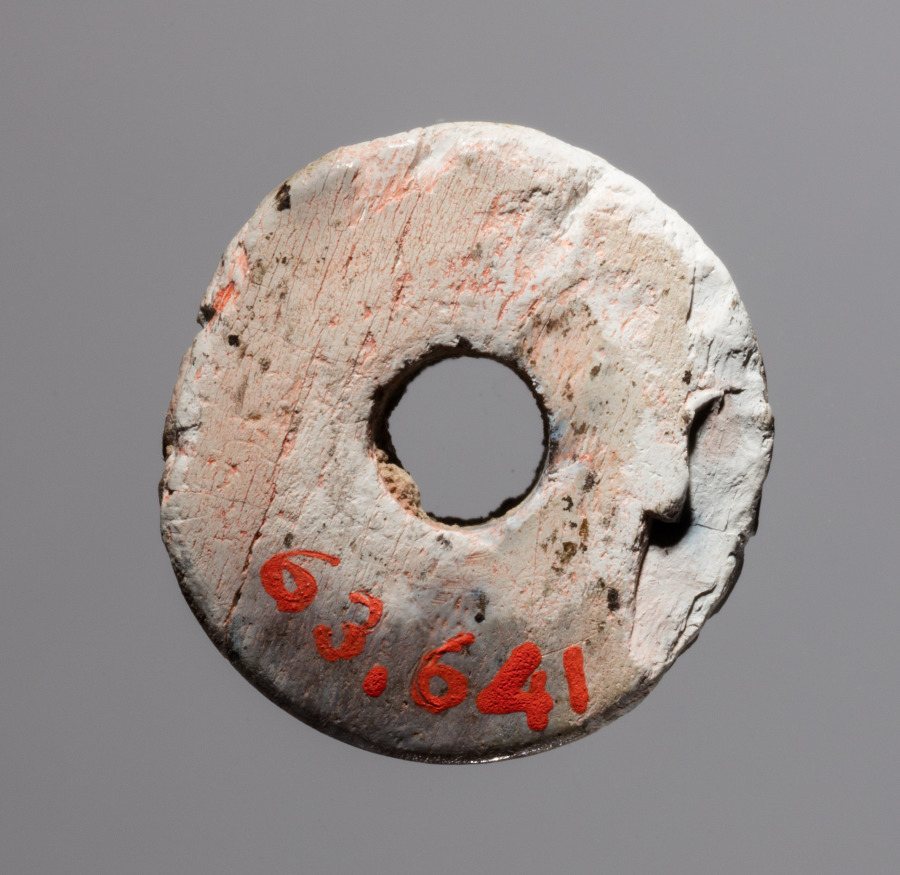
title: Spindle Whorl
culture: Iran, early Islamic period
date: 700s - 900s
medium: bone, incised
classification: Spindle Whorl